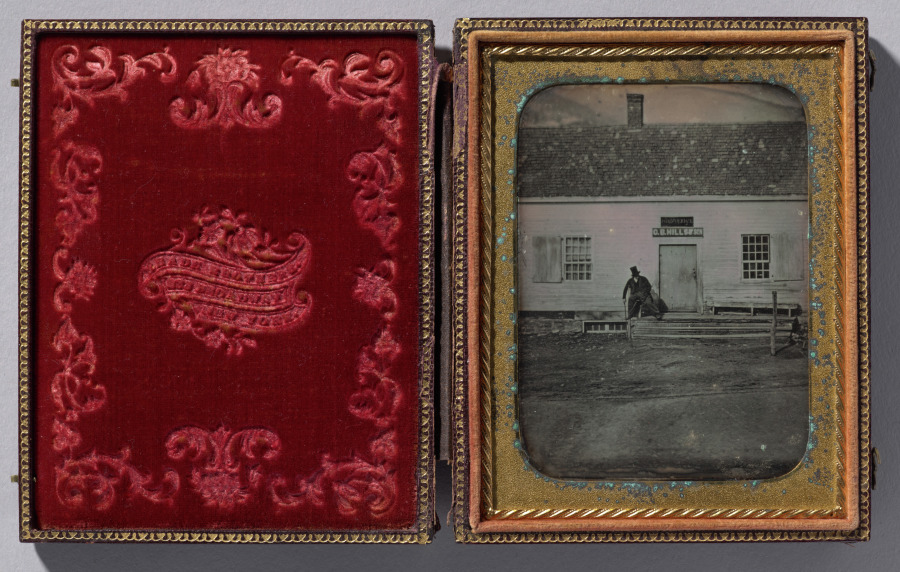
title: Cyrus B. Hills, Postmaster, Arlington, Vermont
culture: America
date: c. 1852–53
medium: daguerreotype, quarter plate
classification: Photograph